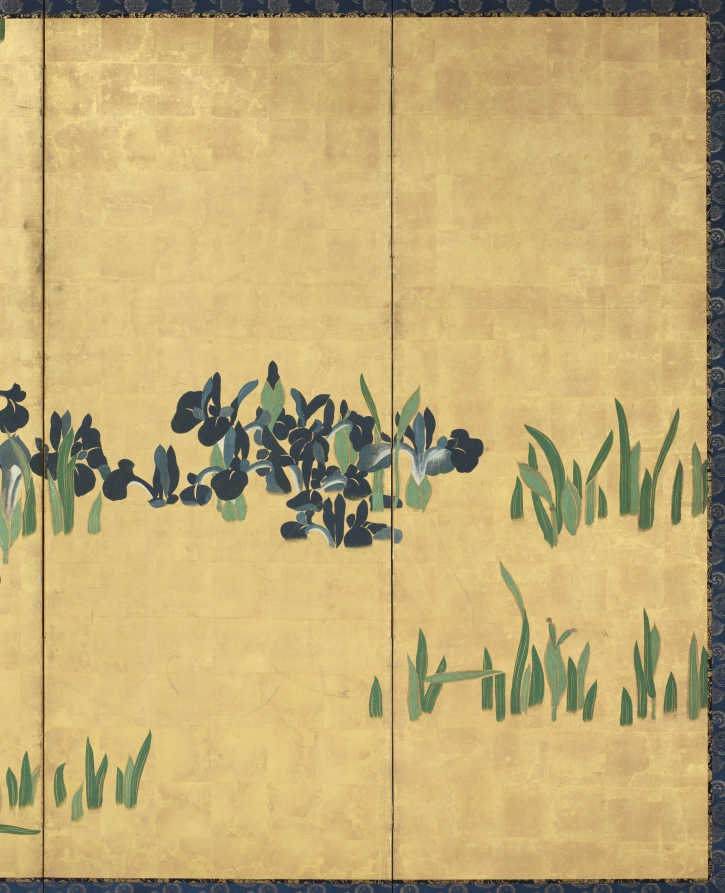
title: Irises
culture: Japan, Edo period (1615–1868)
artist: Watanabe Shikō (Japanese, 1683–1755)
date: 1700s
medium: One of a pair of six-panel folding screens, ink and color on gilded paper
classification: Painting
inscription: signed and sealed lower right of the first panel from the right.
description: The subject of this painting comes from a 10th-century text. It tells of a young nobleman’s journey into the lonely countryside, far from the capital city of Heian-kyō (Kyoto). There he came upon a small stream, the banks of which were covered with blooming irises, on which the artist has chosen to focus our attention. While viewing the beautiful flowers the nobleman composed a poem: I have a beloved wife, Familiar as the skirt of a well-worn robe, And so this distant journeying Fills my heart with grief.